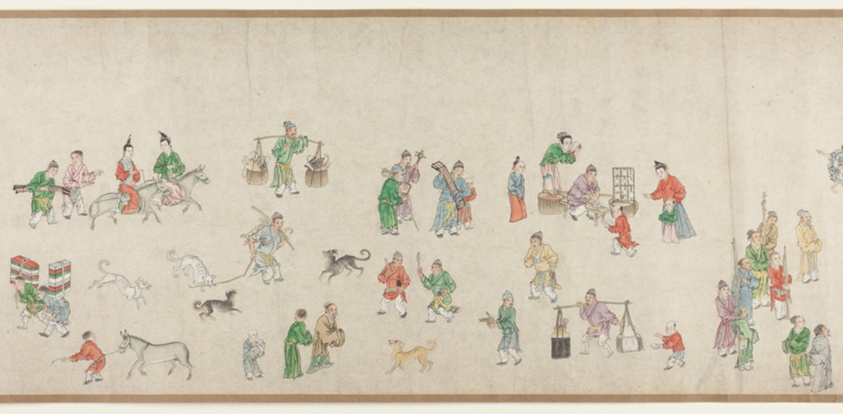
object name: Painting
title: Street Scenes in Times of Peace 太平風會圖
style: Chinese (culture or style)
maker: Zhu Yu (Zhu Junbi) 朱玉（朱君璧）; Chinese, 1293-1365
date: Yuan dynasty (1279–1368), 14th century 元朝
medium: Handscroll; ink and colors on paper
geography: China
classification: handscroll; painting; asian art